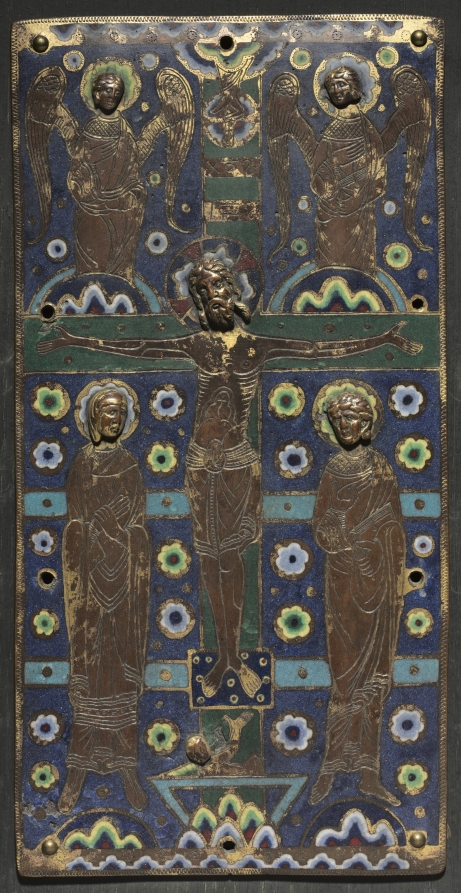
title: Plaque from a Book Cover with the Crucifixion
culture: France, Limousin, Limoges, Gothic period, 13th century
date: 1200–1250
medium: copper: gilded, engraved, chased; champlevé enamel; wood core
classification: Enamel